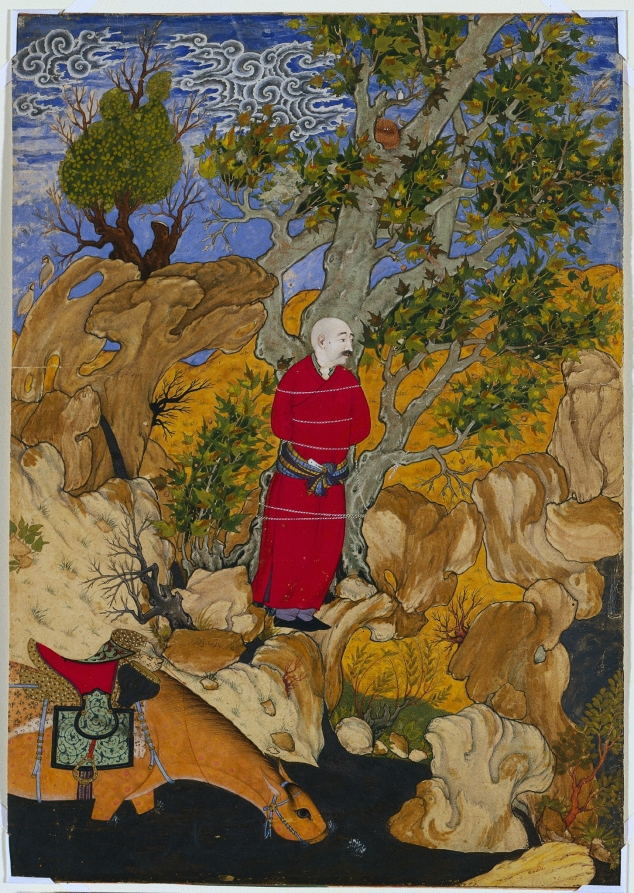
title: Aulad Tied to a Plane Tree, from a Shahnama by Firdausi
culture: Iran, Qazvin or Isfahan?, Safavid period (1501–1722)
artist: Sadiqi Bek (Iranian, 1533–1609)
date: 1575–1600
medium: opaque watercolor, gold, and silver on paper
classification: Manuscript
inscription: Signed in script by the artist.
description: This large-scale illustration reflects a new aesthetic with simpler paintings of isolated figures which artists signed for less sophisticated patrons in the marketplace, replacing the previous idealized court style as a result of decreased support under Shah ‘Abbas (reigned 1587–1629). Instead, he improved the infrastructure to increase international trade and the country’s wealth. The scene depicts Aulad, who guided the legendary hero Rustam through numerous ordeals. Since Aulad was not entirely trusted, Rustam often tied him to a tree, here a plane tree which shelters a pair of nesting birds. The painter, poet, and royal librarian Sadiqi Bek signed his name in tiny script on the brown rock below Aulad.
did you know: Rustam’s dappled horse named Raksh drinks water; it was originally silver, but has now oxidized to black.